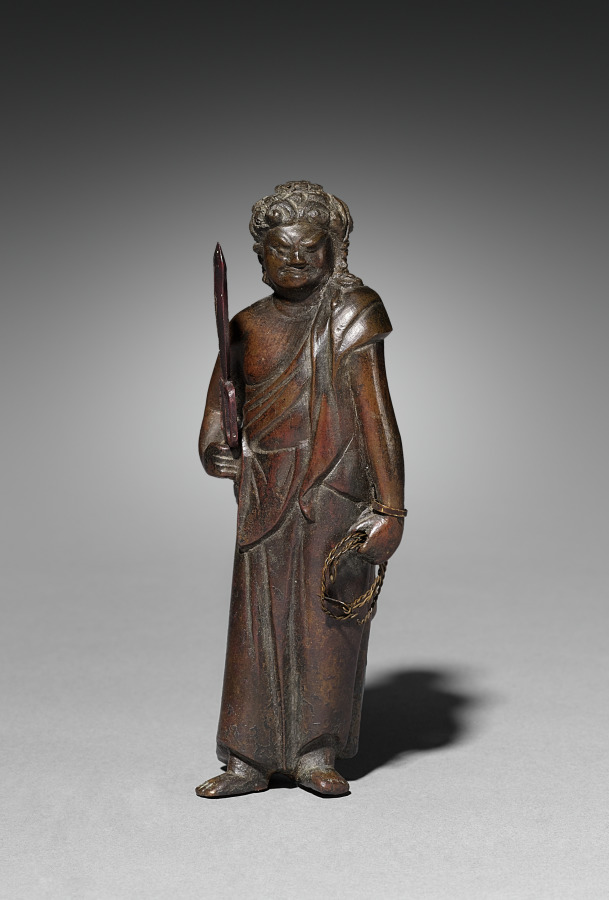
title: Fudō Myōō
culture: Japan, Kamakura period (1185–1333)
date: early 1300s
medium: bronze with wire attachments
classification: Sculpture